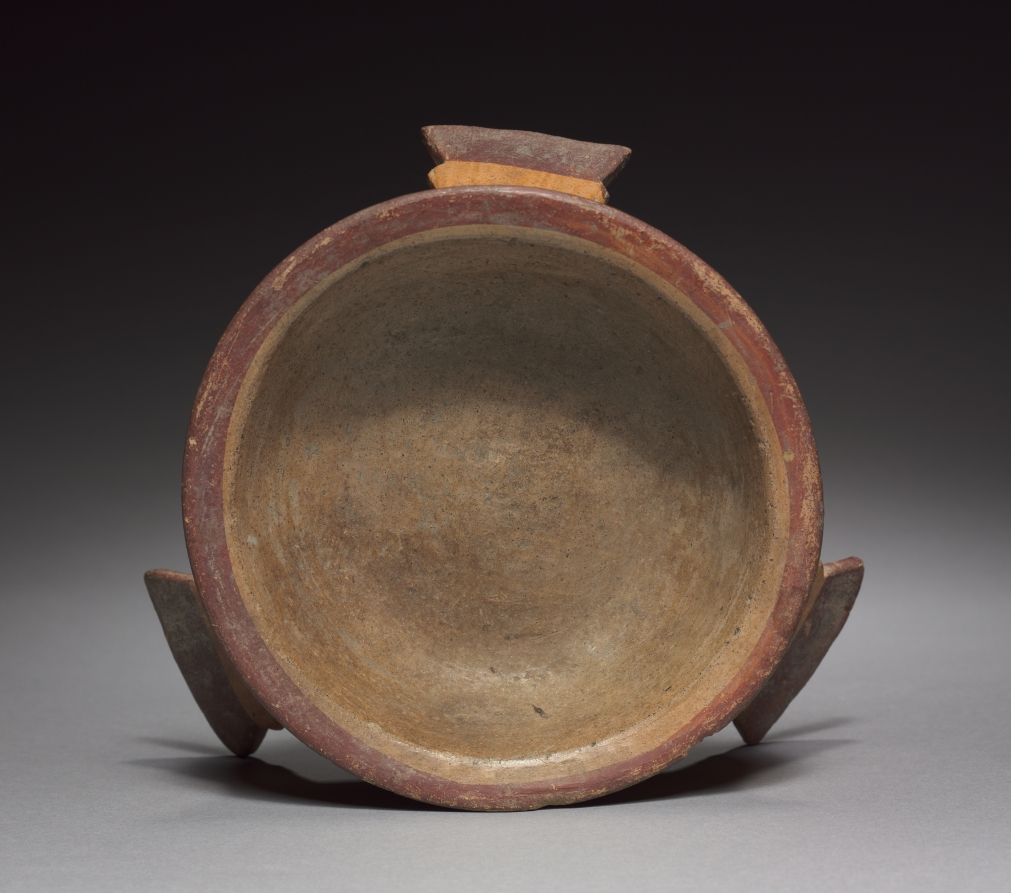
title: Tripod Bowl with Painted Underside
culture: Mexico, Oaxaca, Mixtec, 13th-16th century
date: 1200–1519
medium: pottery with burnished, colored slips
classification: Ceramic